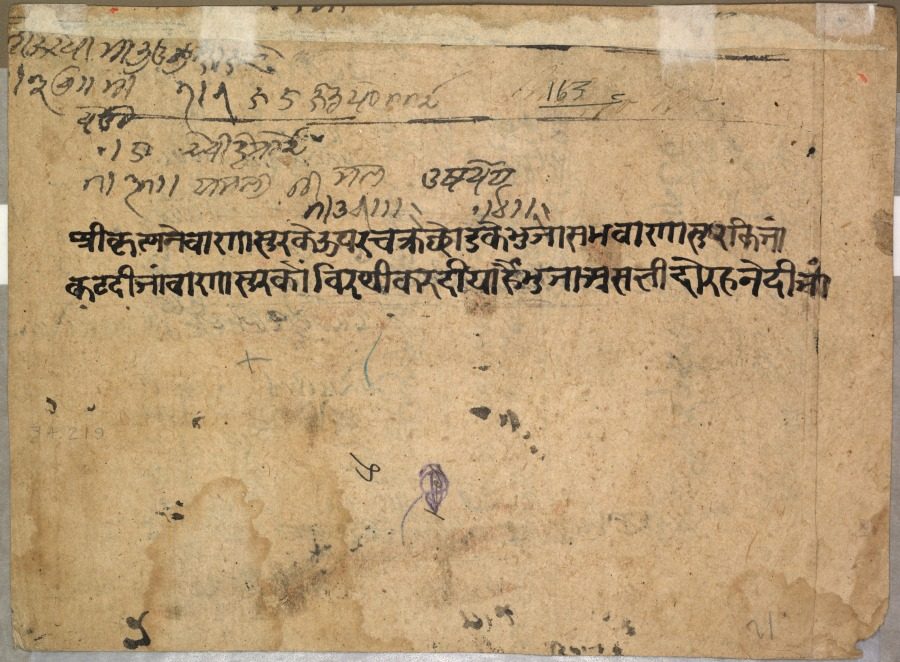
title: Krishna vanquishing King Bana, from an Usha-Aniruddha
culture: Northern India, Pahari kingdoms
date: c. 1840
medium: Gum tempera, ink, and gold on paper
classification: Painting